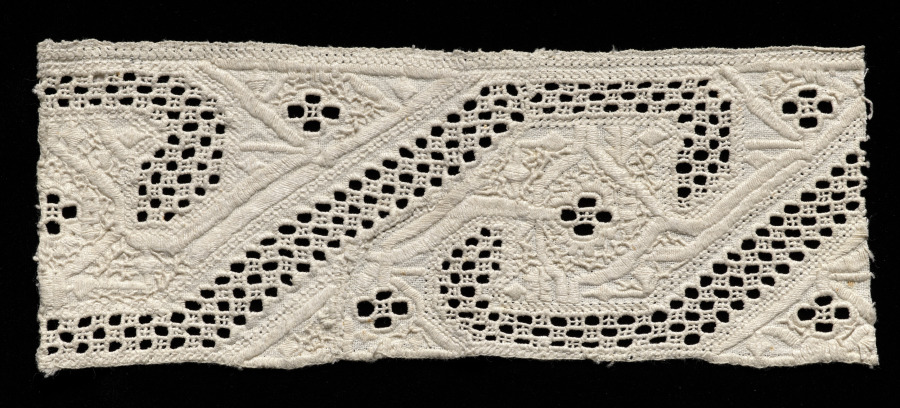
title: Lace fragment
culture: Italy, Venice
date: 1500s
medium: Linen: needle lace (cutwork and reticella) insertion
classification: Lace